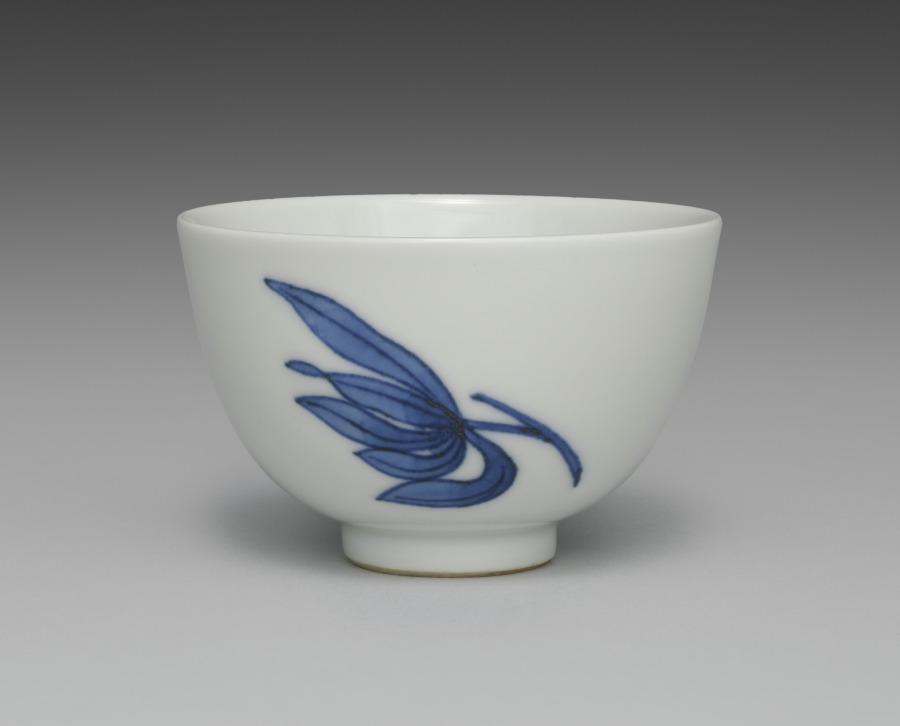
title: Teacup from Tea Set with Orchids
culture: Japan, Meiji period (1868–1912)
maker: Seifū Yohei III (Japanese, 1851–1914)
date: c. 1893–1914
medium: Porcelain with underglaze blue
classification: Ceramic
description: Although the teapot here is stored in a separate box from the five cups, these six pieces may once have been part of a tea set that included other tools such as a water cooler. The teacups have orchid flowers on both sides in underglaze blue, as well as a blue band inside the footring. The teapot has the same design and a blue band painted around the bottom of the lid’s knob. The cups’ long wood storage box is stamped on the exterior, over the lid and base, with a small red seal reading “Satō.” The same seal appears on five small squares of yellow textile, one placed in the bottom of each compartment in the teacup storage box. These are additional to the customary yellow cloths stamped with a “Seifu” seal. Interestingly, four of the Seifū cloths are stamped with an ovoid seal, while the remaining cloth, which is a slightly lighter color, has an unusual seal that is not quite gourd-shaped and with the fū of Seifū in a stylized, unrecognizable form. The teapot has its own box with a Satō seal and is wrapped with an orange textile stamped with the same unusual Seifū seal. A set with a very similar surface design is in the Brooklyn Museum. The Brooklyn set has a water cooler and a small pitcher, in addition to the teapot and cups, and all are in a single storage box. This box records the tea tools as made with kanpakuji, or “bright-jewel white porcelain,” counted among Yohei III’s most important inventions, and carved images. In fact, both sets have a white surface much closer in coloration to the cool white of porcelain clay used in Kyoto at the time, and the designs are simply painted. The Brooklyn set was thus likely mismatched at some point with a box intended for another tea set. Nonetheless, the box may have helped prevent the set’s original components from being dispersed, and the set itself provides insight into how the other tools from the present set may have looked.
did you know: This tea set with orchids has a side-handled pot called a kyūsu, used for steeping, straining, and serving tea.